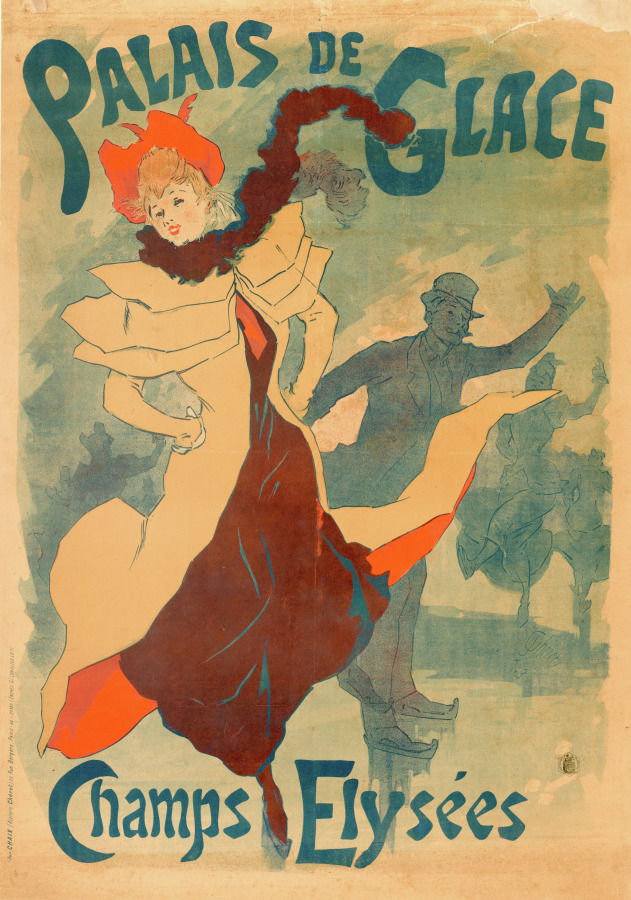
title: Ice Skating Rink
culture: France, Paris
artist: Jules Chéret (French, 1836–1932)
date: 1893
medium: lithograph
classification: Print